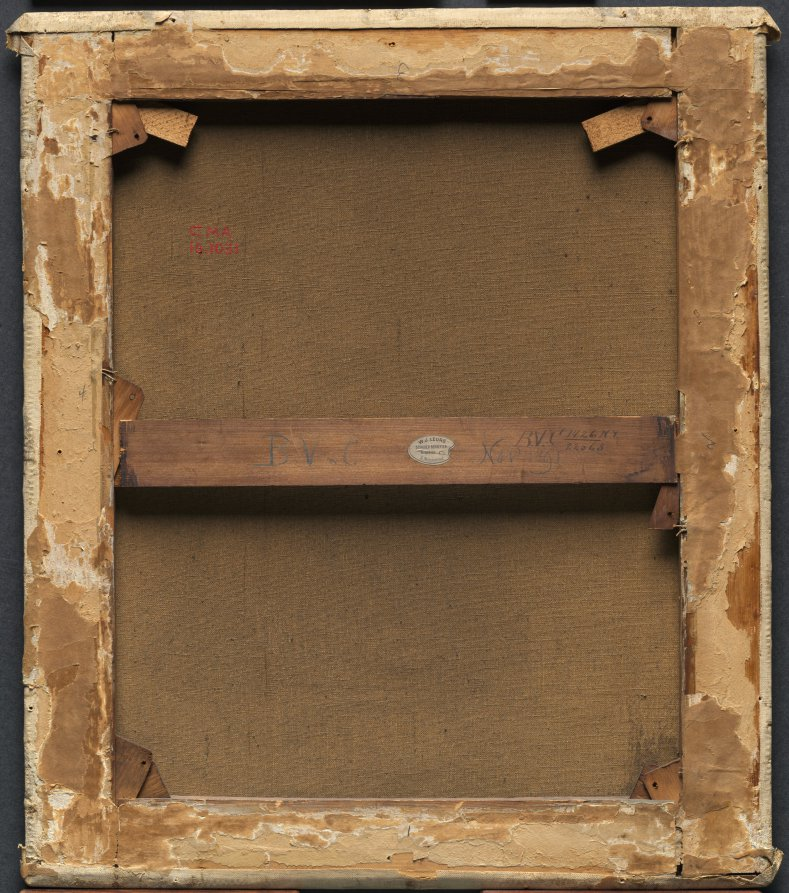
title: The Pancakes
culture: Netherlands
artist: Jozef Israëls (Dutch, 1824–1911)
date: c. 1875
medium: oil on fabric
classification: Painting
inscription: Signed lower left: Jozef Israels